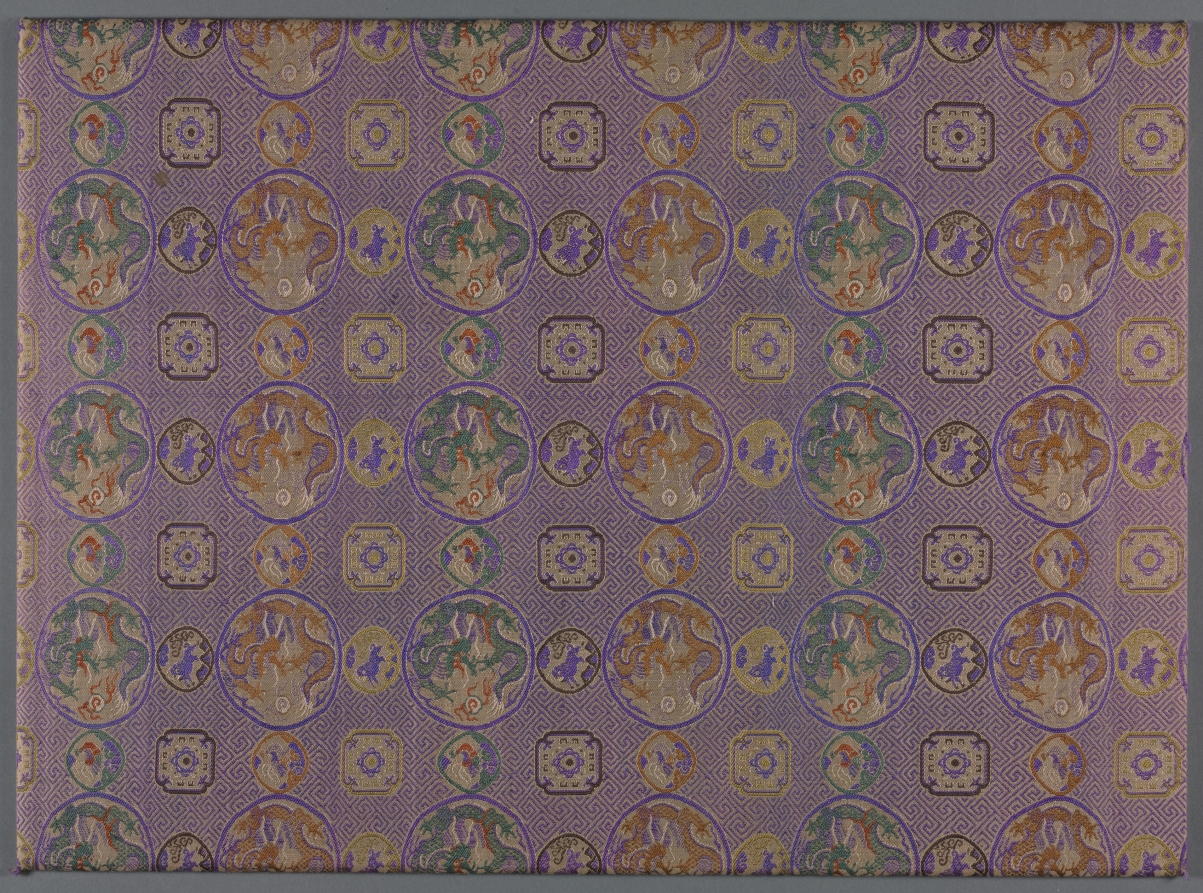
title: Twelve Views of Tiger Hill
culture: China, Ming dynasty (1368–1644)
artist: Shen Zhou (Chinese, 1427–1509)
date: after 1490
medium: Album of twelve leaves; ink or ink and slight color on paper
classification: Painting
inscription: [印] 启南; 石田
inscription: 1 colophon and 1 seal of Yao Yuanzhi 姚元之 (1776-1852). The brushwork of this album is aged and powerful. It is so vigorous that it gives you a feeling of the mist and clouds when looking at it. It could not be done by any other than the old master, Shen Zhou. Formerly the album was in the collection of Hu Zhishou's 胡之壽 family. After many changes of hands, it came finally into the possession of Ligeng 笠耕, the Keeper of the Imperial Stable [that is, Binliang 斌良, Manchurian poet-calligrapher, later the Imperial Resident in Lhasa, Tibet, 1784-1847]. Not long ago, when its former owner Zhishou came to visit me and found the album in my study, he sighed in nostalgia and told me that there were originally an inscription and colophons in the album which are now lost. Song Luo 宋犖 [zi 牧仲, 1634-1713] once had a poem by Shen Shitian on the painting of Tiger Hill. [The poem is missing from the album.] It must be a poem written for this album. However, according to Song's own title, the poem was composed after the rhymes and meter of the original poem on the album. Now there is no poem whatsoever in the frontispiece or at the end of the album. Is this what Zhishou meant - that the original colophons and inscriptions are missing? Ligeng, the Keeper of the Imperial Stable, has asked me for a colophon. The album has been left on my desk since last year. How time has passed! On the first day of the jiashen year 甲申 [1824], I returned from the Court Audience. The plum trees in the pots have started to blossom with their first fragrance. How much has this added to my enjoyment of the painting! I therefore write down a few words for your criticism. [signed] the Student of the Grass Leaf Pavilion, Yao Yuanzhi.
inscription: 3 seals of Hou Shigong 侯士恭 [late 19th–early 20th century]. (1 each on the colophon, seventh, and eleventh leaves).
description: Views of Tiger Hill depicts a historic site a few miles northwest of Suzhou. The scenes simulate a visit from arriving by boat at the foot of the mountain to climbing to Cloudy Cliff Monastery. Representations of the artist’s mature style, Shen Zhou included views in subtle colors in the suite of monochrome scenes. A Suzhou native, Shen Zhou was supported by family wealth and rejected an official career in favor of life as a retired scholar. Turning to painting in midlife, he is regarded as the founder of the Wu School of painting, with its center in Suzhou.